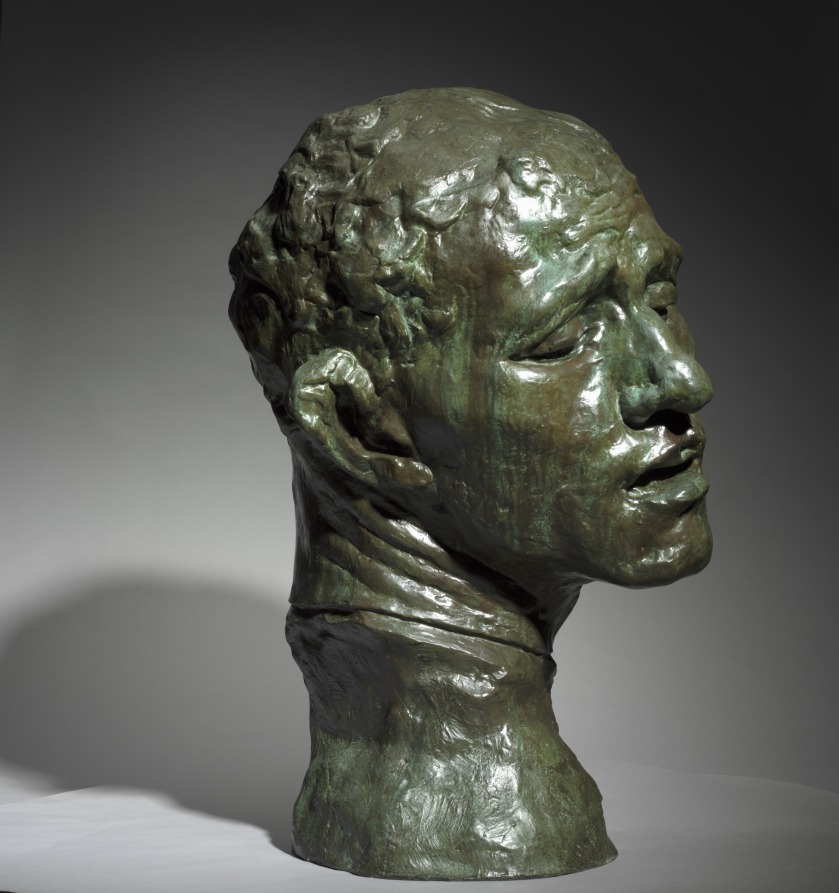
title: Heroic Head of Pierre de Wissant, One of the Burghers of Calais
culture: France, 19th century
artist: Auguste Rodin (French, 1840–1917)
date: 1886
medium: bronze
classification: Sculpture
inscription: inscribed at neck, left: A.Rodin; inscribed lower back: Alexis Rudier/Fondeur-Paris.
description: This sculpture depicts one of the figures in Rodin’s large public monument The Burghers of Calais (1884–89), featuring six French men who volunteered to be taken prisoner by the English in exchange for lifting the siege of Calais during the Hundred Years War (1337–1453). Pierre de Wissant’s anguished expression suggests extreme mental suffering as he contemplates his expected execution. Rodin exhibited a life-size version of the figure as an independent work before completing the monument. He later made multiple versions in various sizes and media.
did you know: This sculpture depicts the head of a figure from Rodin's large public monument The Burghers of Calais (1884-89). The CMA also owns a plaster version of the head.